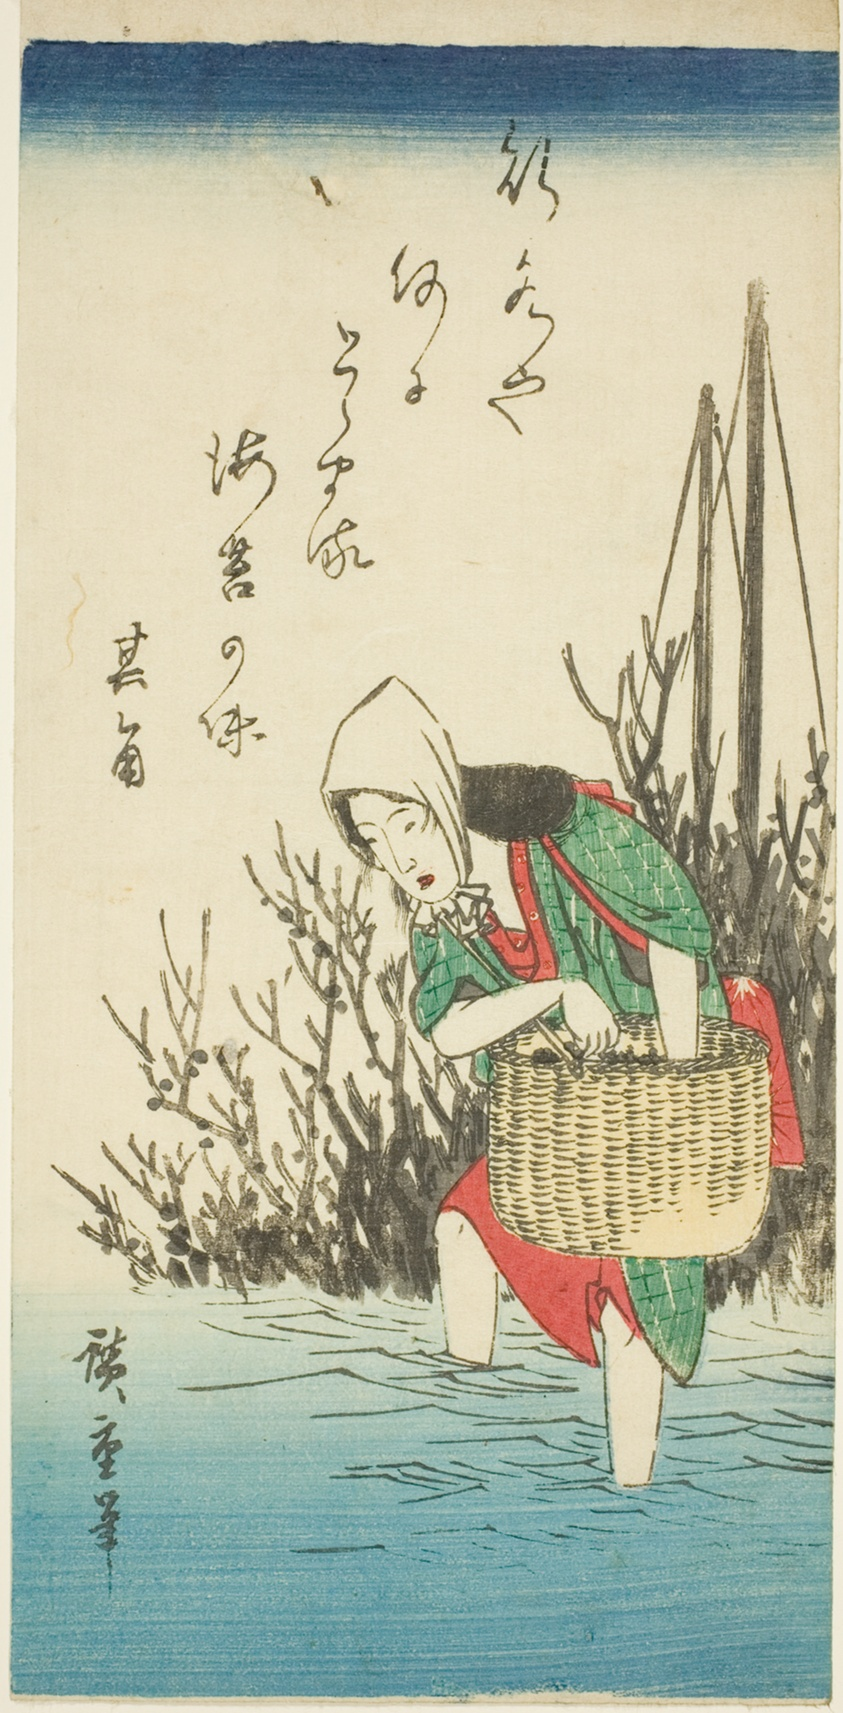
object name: Print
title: Woman gathering seaweed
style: Japanese (culture or style)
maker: Utagawa Hiroshige 歌川 広重; Japanese, 1797-1858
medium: Color woodblock print; sanchogake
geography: Japan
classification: woodblock print; print; asian art